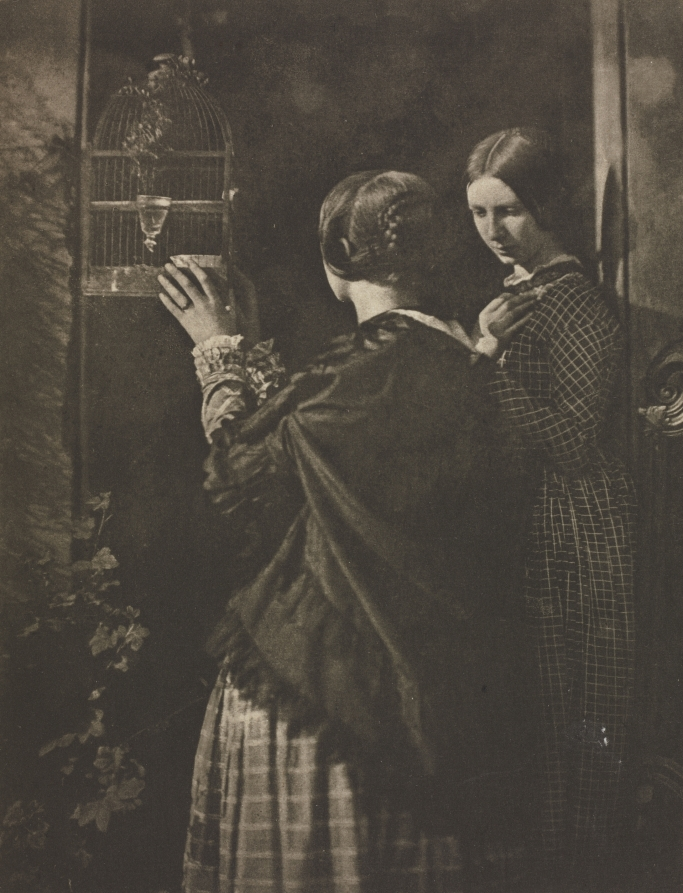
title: Camera Work: The Bird-Cage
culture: England, 20th century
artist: David Octavius Hill (British, 1802–1870)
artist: and Robert Adamson (British, 1821–1848)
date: 1909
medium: photogravure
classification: Bound Volume